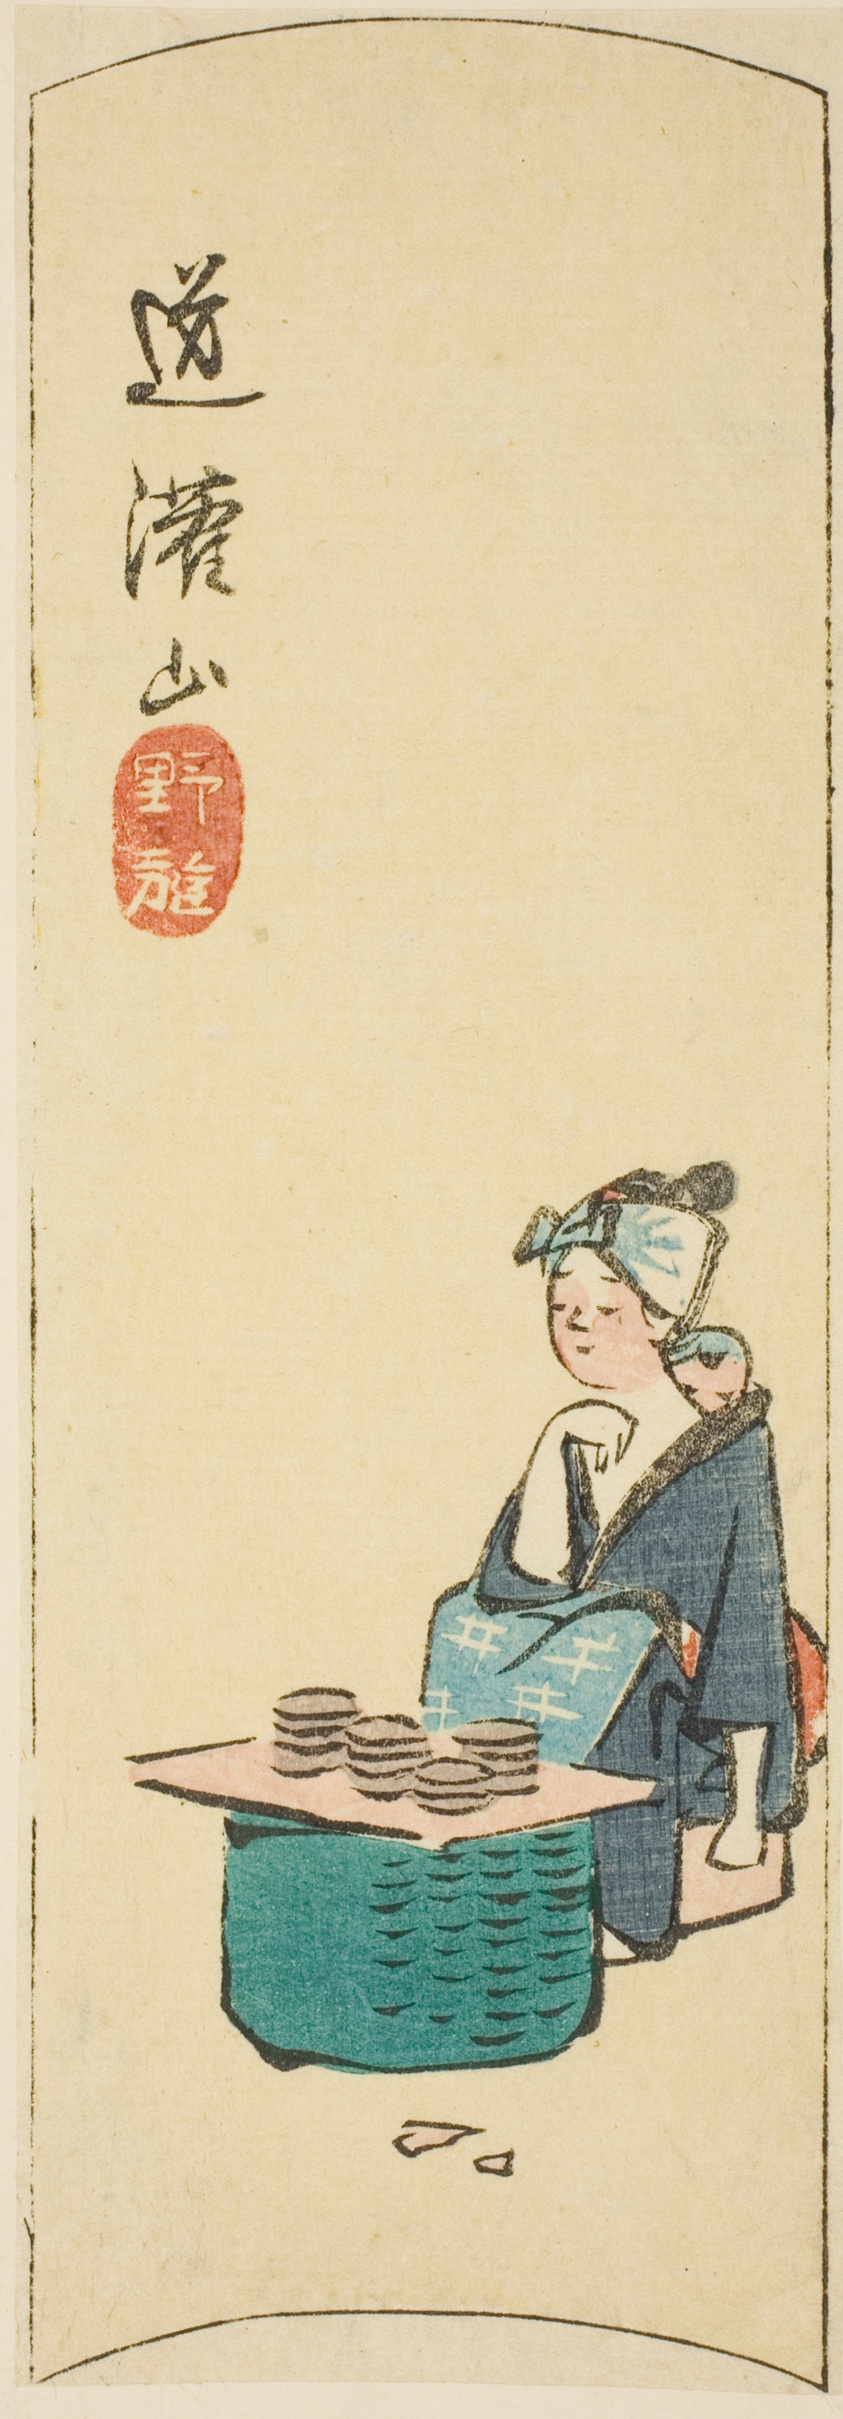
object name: Print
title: Outdoor Amusements at Dokan Hill (Dokanyama noasobi), section of a sheet from the series "Cutouts of Famous Places in Edo (Harimaze Koto meisho)"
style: Japanese (culture or style)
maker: Utagawa Hiroshige 歌川 広重; Japanese, 1797-1858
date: 1852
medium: Color woodblock print; section of harimaze sheet (uncut sheet: 1939.1288)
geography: Japan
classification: woodblock print; print; asian art